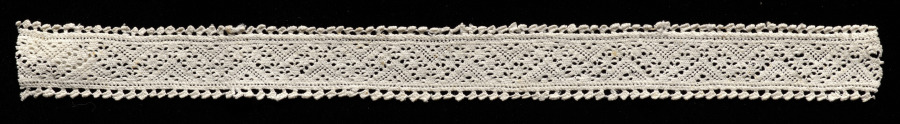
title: Lace Fragment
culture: Italy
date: 1600s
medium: Needle lace (punto avorio or ivory stitch) insertion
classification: Lace